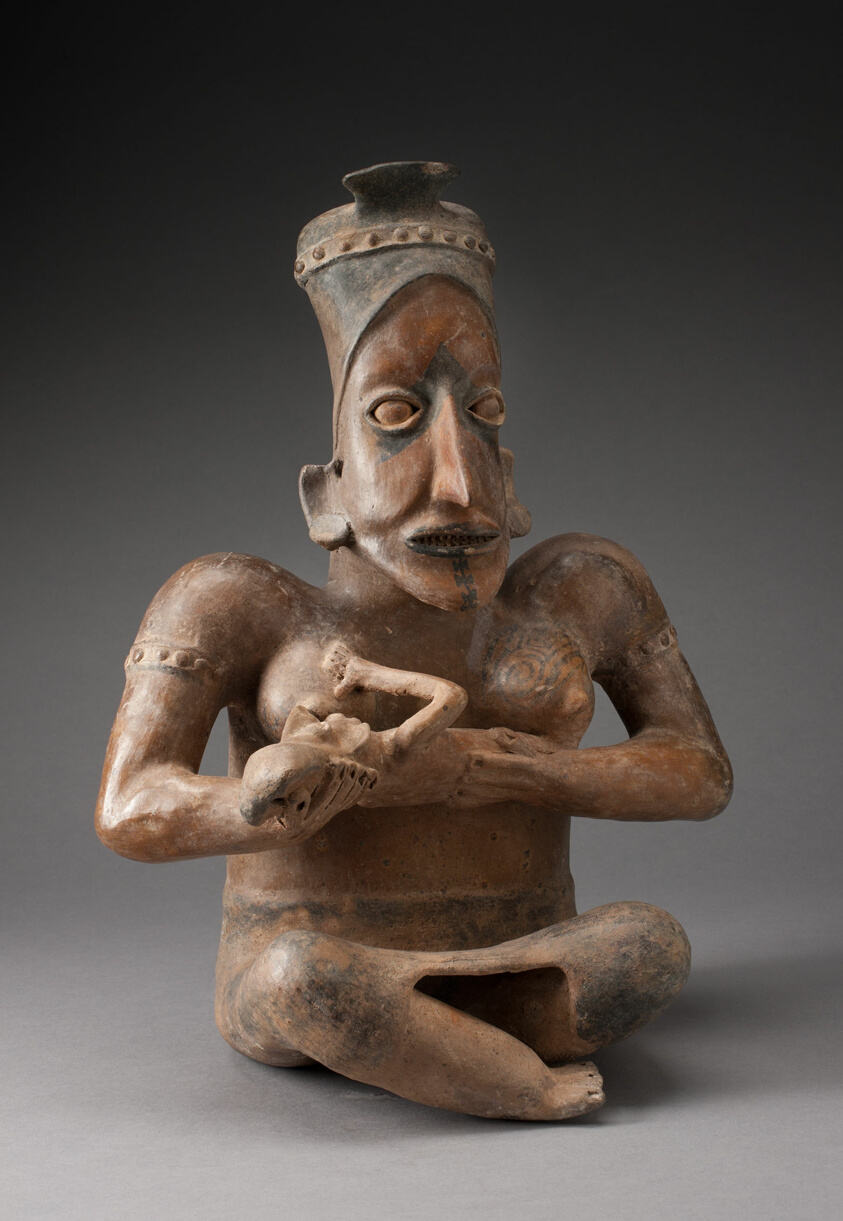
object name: Sculpture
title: Seated Maternity Figure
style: jalisco, ameca, mesoamerican, Arts of the Americas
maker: Jalisco, Ameca style; Jalisco, Mexico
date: 100 BCE–300 CE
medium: Ceramic and pigment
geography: Colima state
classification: sculpture; art of the americas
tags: mothers, children, people